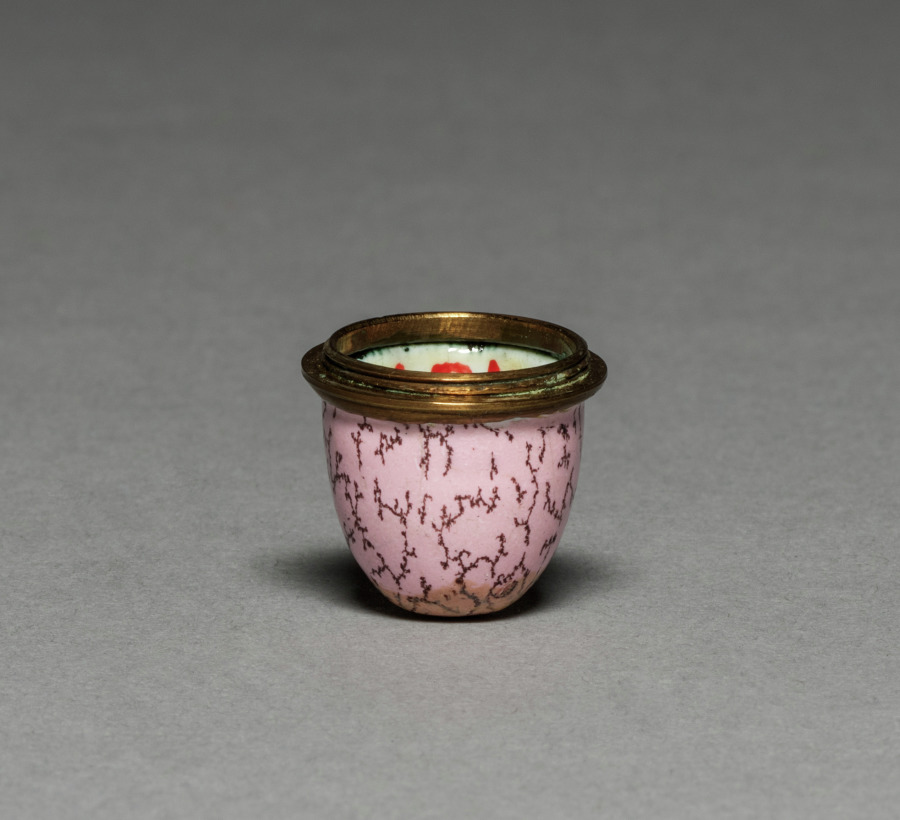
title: Thimble and Container (Container)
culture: England, mid-18th century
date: mid-18th century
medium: enamel on metal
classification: Enamel